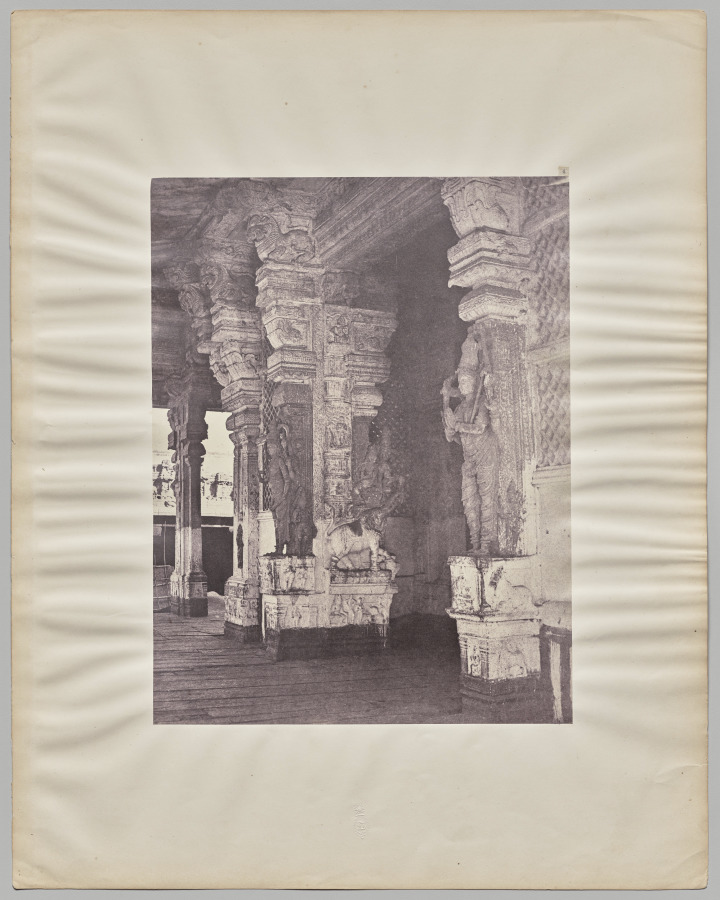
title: Pudhu Mandapa of Tirumal Nayak (r. 1623–59), Minakshi Sundareshvara Temple, Madurai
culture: England, 19th century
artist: Captain Linnaeus Tripe (British, 1822–1902)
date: 1858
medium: albumen print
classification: Photograph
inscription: Imprinted in black type on white paper adhered to recto of mount: "4"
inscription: Embossed on recto of mount: "LT/Photographer to Government"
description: The temple complex that contains this open, pillared hall is dedicated to Minakshi, a form of Parvati, and her consort, Sundareshvara, a form of Shiva. The central column depicts Shiva feeding sugarcane to an elephant. Because Linnaeus Tripe respected the Hindu temples as places of religious, historical, and artistic value, he strove to document the carvings decorating the temples, even when they were hidden in shadow.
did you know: This hall was built to serve as a summer house for the gods to whom the temple is dedicated.